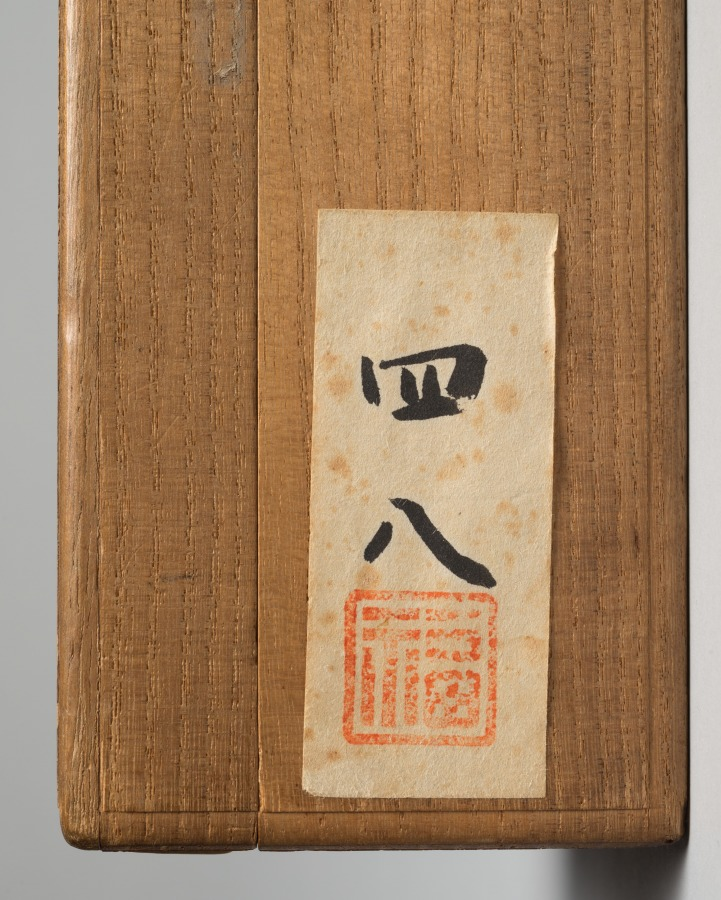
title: Immortal Riding on a Carp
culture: Japan, Edo period (1615–1868)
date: c. 1600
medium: hanging scroll; ink on paper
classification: Painting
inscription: seal of Motonobu ?